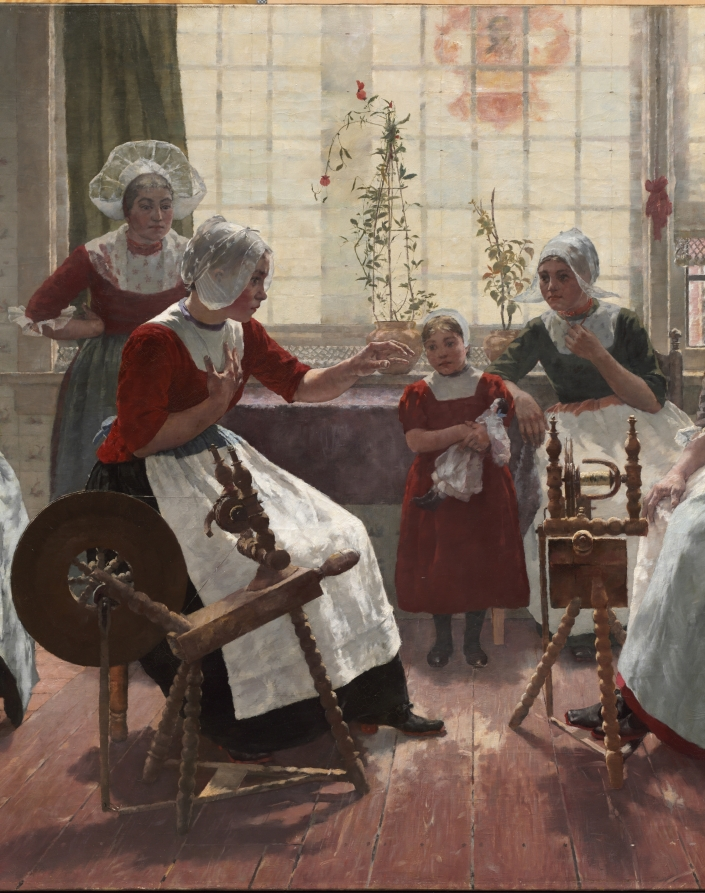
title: The Ghost Story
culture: America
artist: Walter MacEwen (American, 1860–1943)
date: 1887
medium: oil on canvas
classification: Painting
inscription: signed upper left: W. McEWEN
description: During the 1880s, the Netherlands became a magnet for several American artists, among them Walter MacEwen. His most famed painting, The Ghost Story, presents a group of individuals in a Dutch interior listening with rapt attention to spooky narration delivered by a woman at a spinning wheel. A young girl clutches her doll in fascination.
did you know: The women in this painting wear the traditional clothing of Volendam, a fishing village located in the province of North Holland.